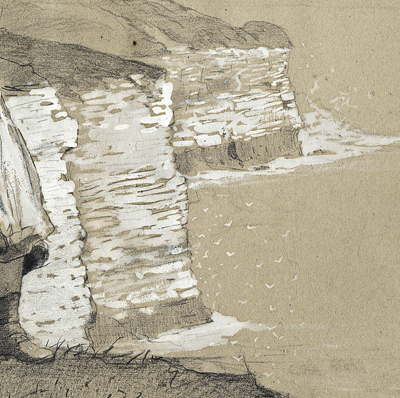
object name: Drawing and Watercolor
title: Flamborough Head, England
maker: Winslow Homer (American, 1836-1910)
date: 1882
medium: Graphite and opaque white watercolor on medium thick, slightly textured, tan laid paper with red and blue fibers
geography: United States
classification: watercolor; drawings (visual works); prints and drawing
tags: women, people, seascapes